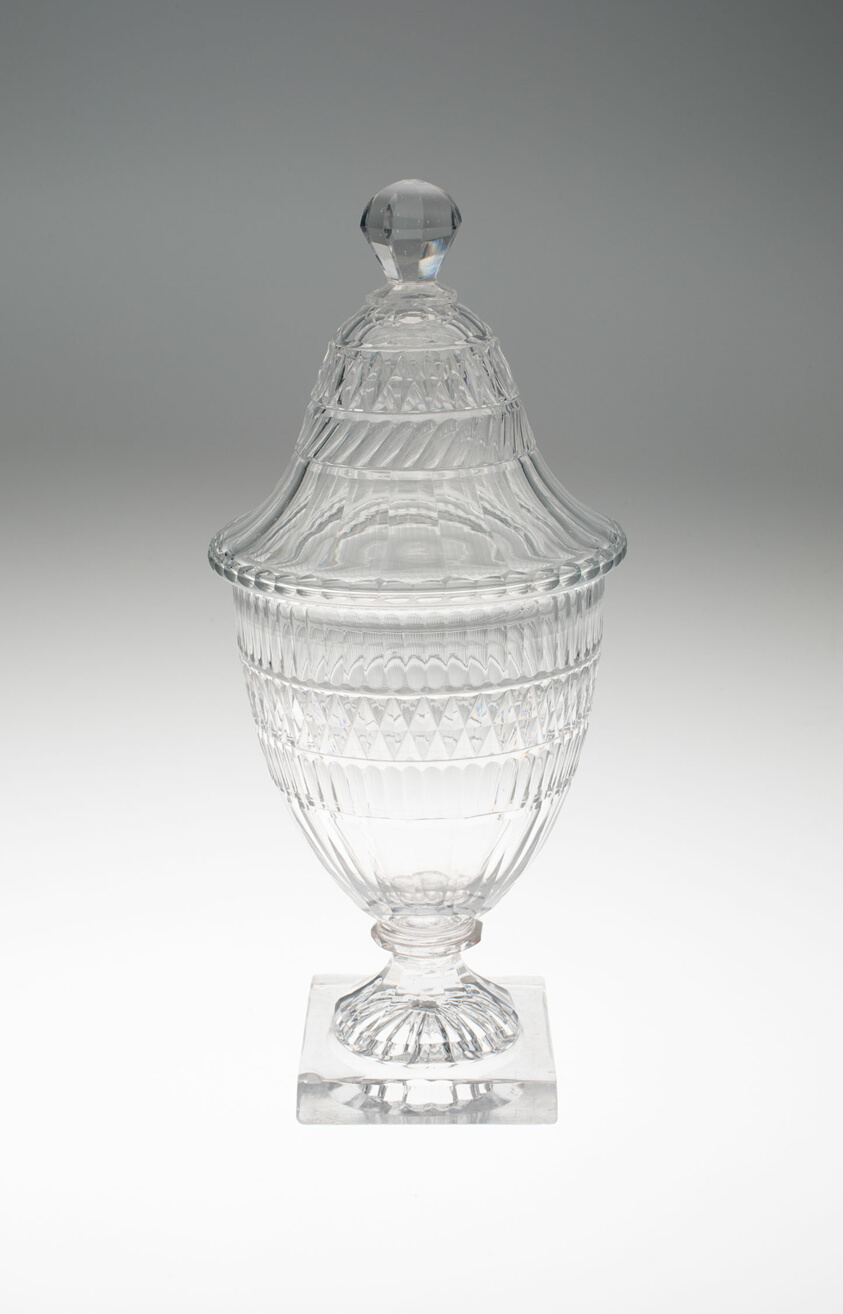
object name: Glass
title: Covered Urn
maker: England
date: 1810/30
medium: Glass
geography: England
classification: compote; dish (vessel); european decorative arts; glass